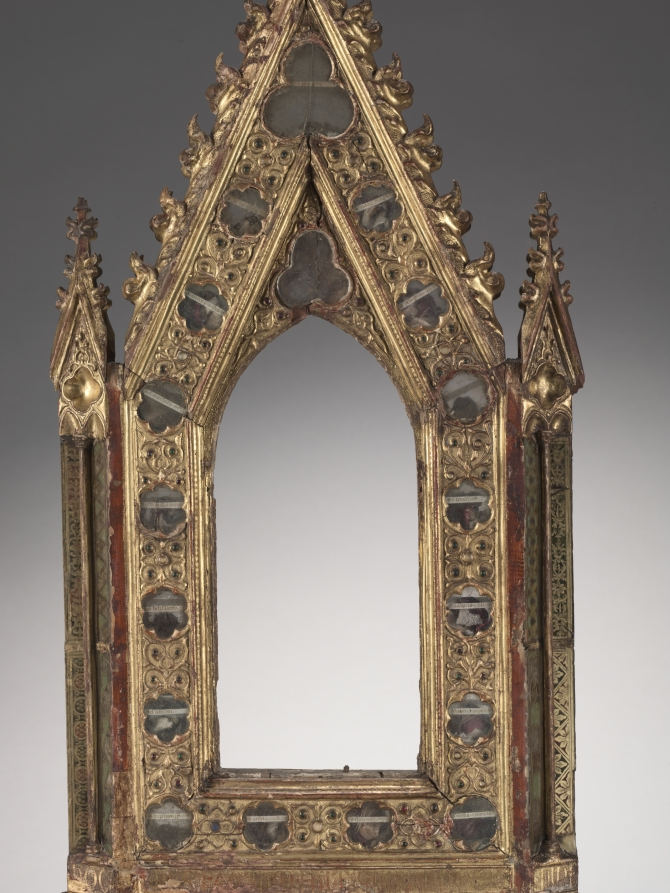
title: Frame for a Portable Reliquary Icon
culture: Italy, Siena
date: 1347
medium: gilded wood, modeled gesso, verre églomisé, glass cabochons, and relics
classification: Glass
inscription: an inscription with a stipled background runs around the lowest edge of the upright part of the frame: obverse: HOC/OPUS : FACTUM . FUIT . SUB . ANNO . DO/MINI; reverse: [small loss] /CCC . XLVII . TEMPORE . DOMINI . MINI/CINI. [This/work : has . been . made . under . year . of . the . Lord [small loss] /300 47 . in . the . time . of the Lord . Mini/Cini.] Another inscription appears on the obverse and reverse of the base: LUCAS ME FECIT. [Luke has made me.]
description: In the Middle Ages relics were thought to possess extraordinary power and were enshrined in lavish vessels called reliquaries. This complex frame once contained a painted image on each side, believed to be the Madonna and the Crucifixion, both long since lost. These images were surrounded by 17 carefully labeled relics, still visible. Intentionally portable, such votive objects could be easily carried from room to room or building to building as needed. A Latin inscription around the base reads: This work has been made under the year of the Lord CCCXLVII [1347] in the time of the Lord Mini/Cini. The inscription likely refers to Mino Cinughi, rector of the Hospital of Santa Maria della Scala in Siena, 1340-51. The Cinughi coat of arms as well as those of the hospital appear on the base. Another inscription, LUCAS ME FECIT (Luke made me), appears on both sides of the base. While this object probably resided on an altar in the hospital, the fact that it has two sides suggests it was carried aloft in processions.